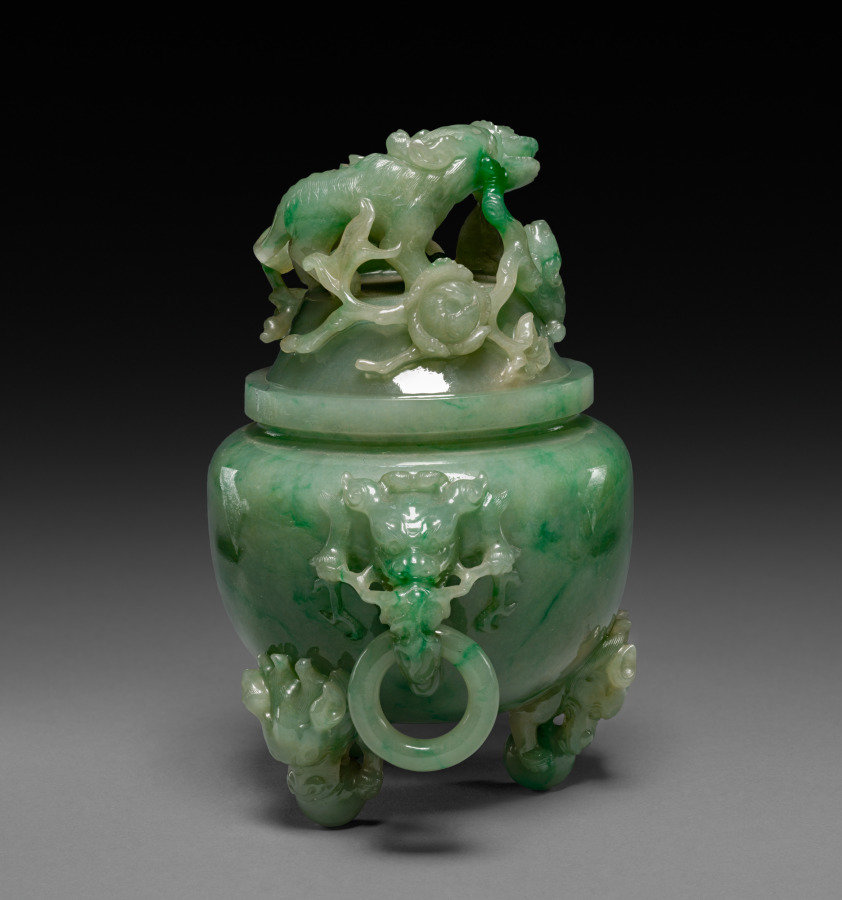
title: Tripod Vase: Ting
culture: China, Qing dynasty (1644-1911)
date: 1644–1911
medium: jade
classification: Jade